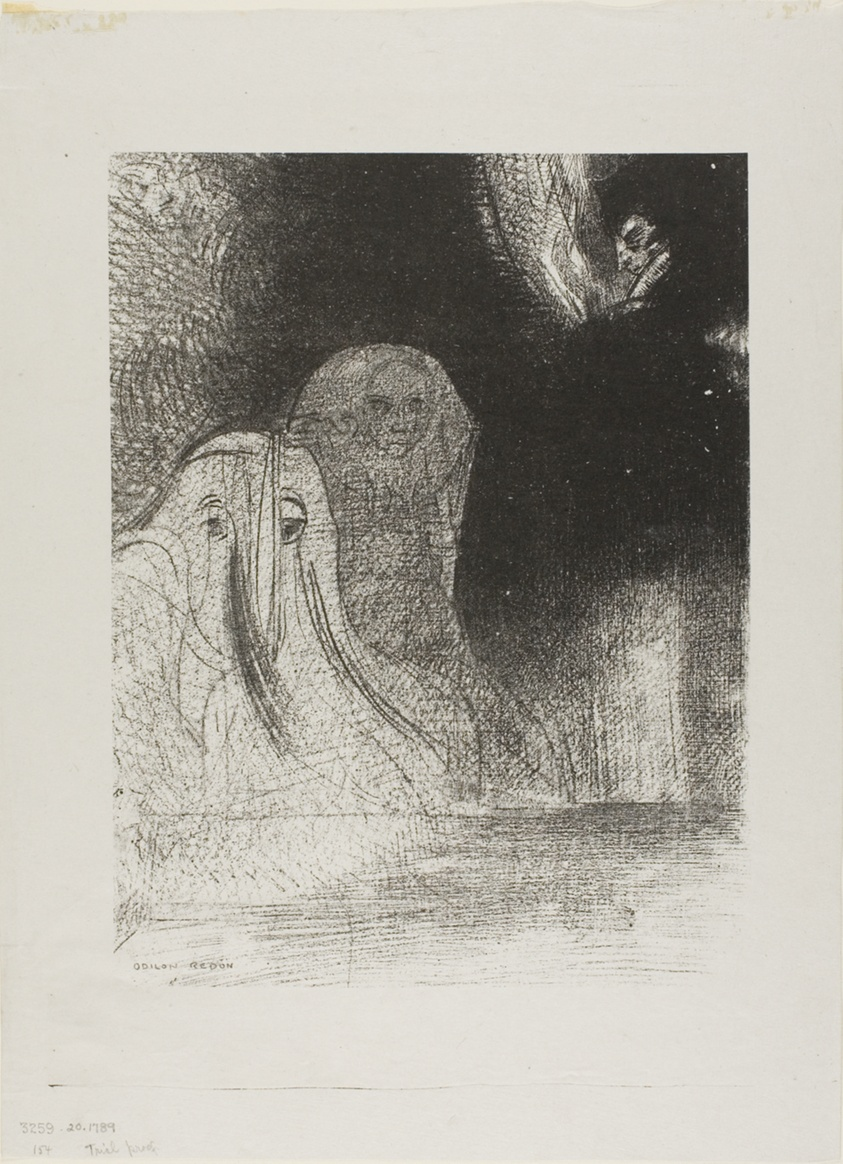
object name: Print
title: I Have Sometimes Seen in the Sky What Seemed Like Forms of Spirits, plate 21 of 24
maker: Odilon Redon (French, 1840-1916)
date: 1896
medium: Lithograph in black on light gray loose chine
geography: France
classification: lithograph; print; prints and drawing; paper